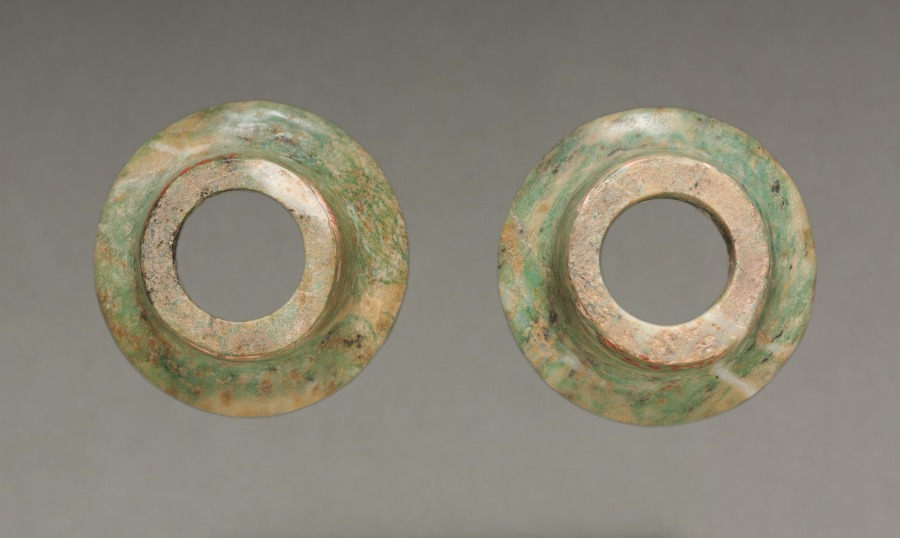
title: Pair of Ear Ornaments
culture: Central Mexico, Teotihuacán style, Classic period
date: 150–200 CE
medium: jadeite-albitite(?)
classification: Sculpture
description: Near Teotihuacán's largest palace is a small temple gorgeously ornamented with green-feathered serpents, symbols of the earth's fertility. Beneath the temple lie at least 120 human sacrifices, most men, many warriors, and some wearing greenstone ornaments like these, perhaps a set. The sacrifices, apparently laid out to mark the cardinal directions, may have consecrated the temple or a ruler's tomb, or both.